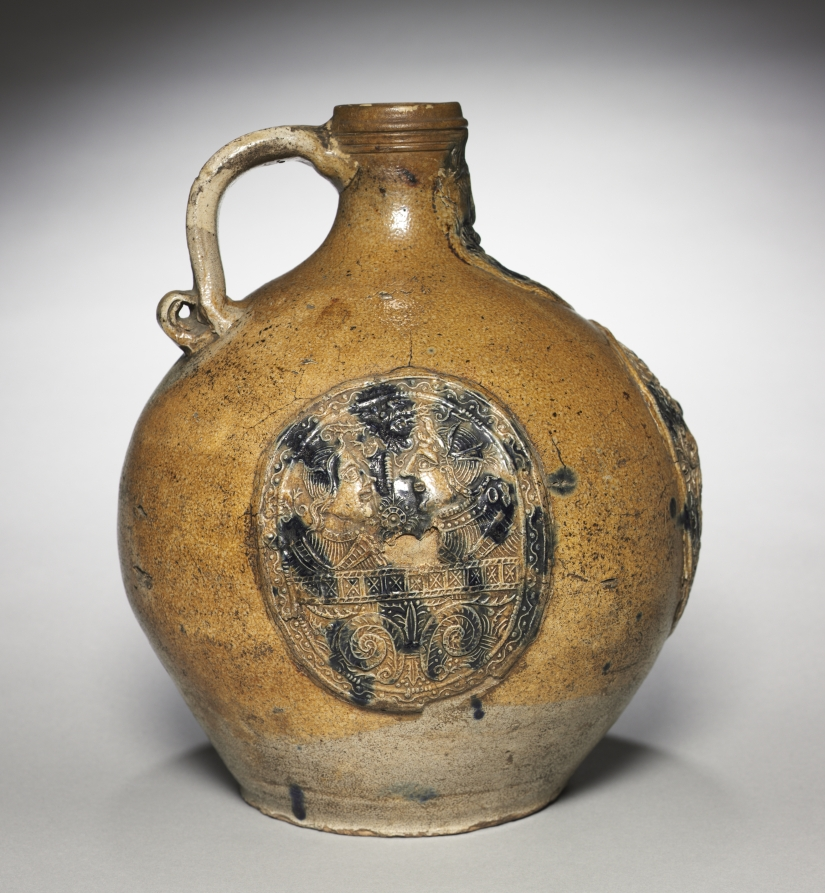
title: Jug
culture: Germany, Frechen, 17th century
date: 1608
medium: salt-glazed stoneware with applied and impressed decoration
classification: Ceramic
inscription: above the shield: 1608.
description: These globular jugs decorated with bearded masks on their necks represent an important type of Rhenish stoneware made from the 1400s onward. They were named "Bartmann" (Bearded Man) or "Bellarmine" jugs. The latter was a reference to Cardinal Bellarmine (1542–1621)—hated in Germany for his Counter-Reformational zeal—because of his supposed resemblance to the bearded images on these vessels. This jug bears the arms of the Pallant van Culemborg family of Gelders. The production and export of German stoneware reached its peak in the late 1500s. Prized for its durability and stone-like appearance, German stoneware became one of the most widely traded forms of pottery, even finding popularity in early America. The distinctive pebbly glass surface, resembling an orange peel, was achieved by introducing salt into the hot kiln during the firing process. This glaze gave clear definition to the coats of arms or other emblems that often formed the surface decoration on large works, usually jugs.